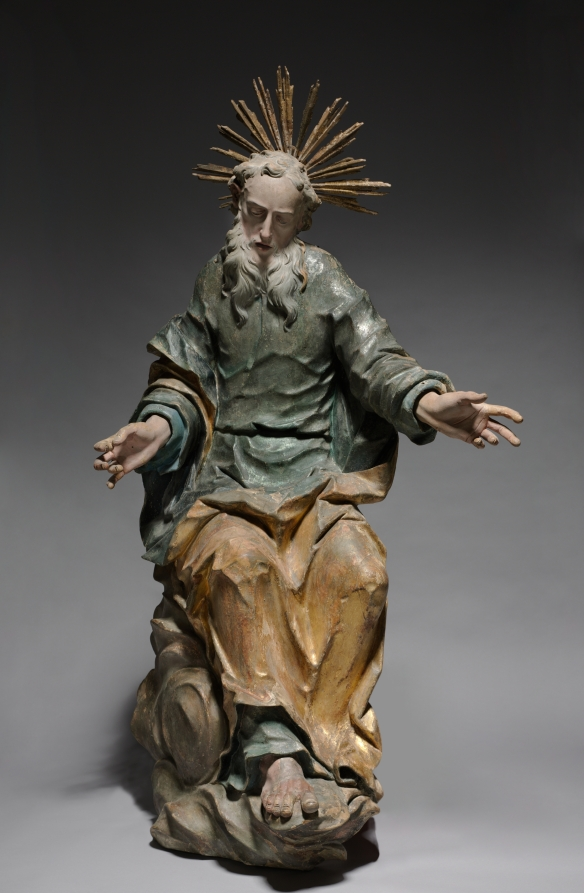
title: God the Father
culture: Austria, Lambach, 18th century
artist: Johann Peter Schwanthaler (Austrian, 1720–1795)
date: c. 1760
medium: painted and gilded wood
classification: Sculpture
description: Johann Peter Schwanthaler belonged to a renowned family of sculptors that produced works for religious and domestic settings throughout Bavaria, Austria, and southern Germany for more than 250 years. This imposing image of God the Father would have formed part of a larger group, probably at the top of an altar. The figure displays the characteristic features of Schwanthaler’s style, such as the elongated figural proportions, sharp-edged drapery folds, and the beautifully expressive, anatomically detailed hands.